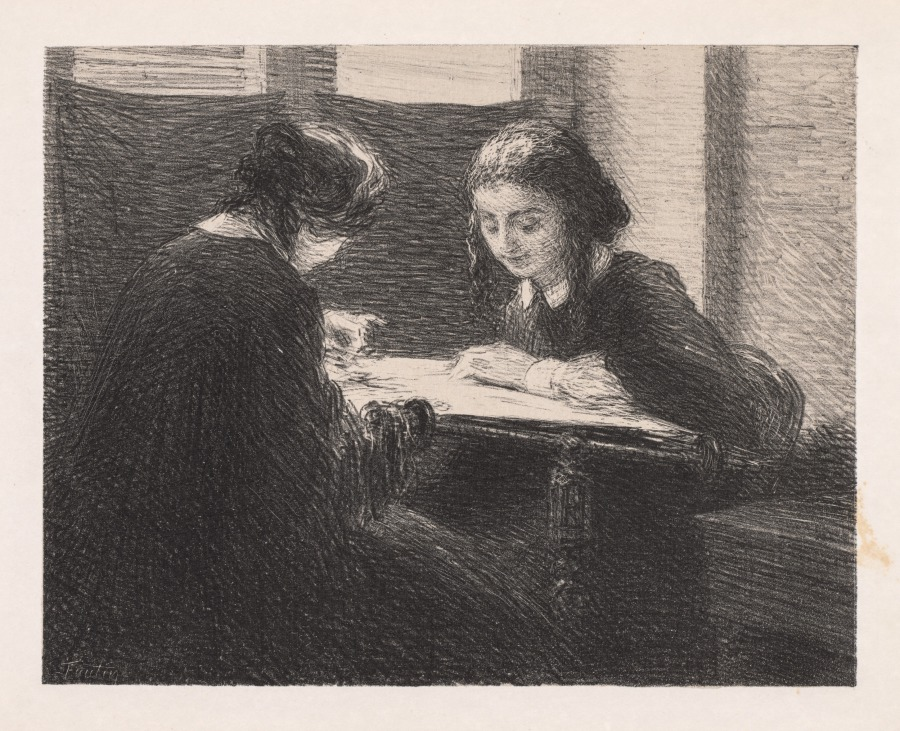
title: The Embroideres (Les Brodeuses),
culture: France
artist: Henri Fantin-Latour (French, 1836–1904)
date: 1898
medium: lithograph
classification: Print